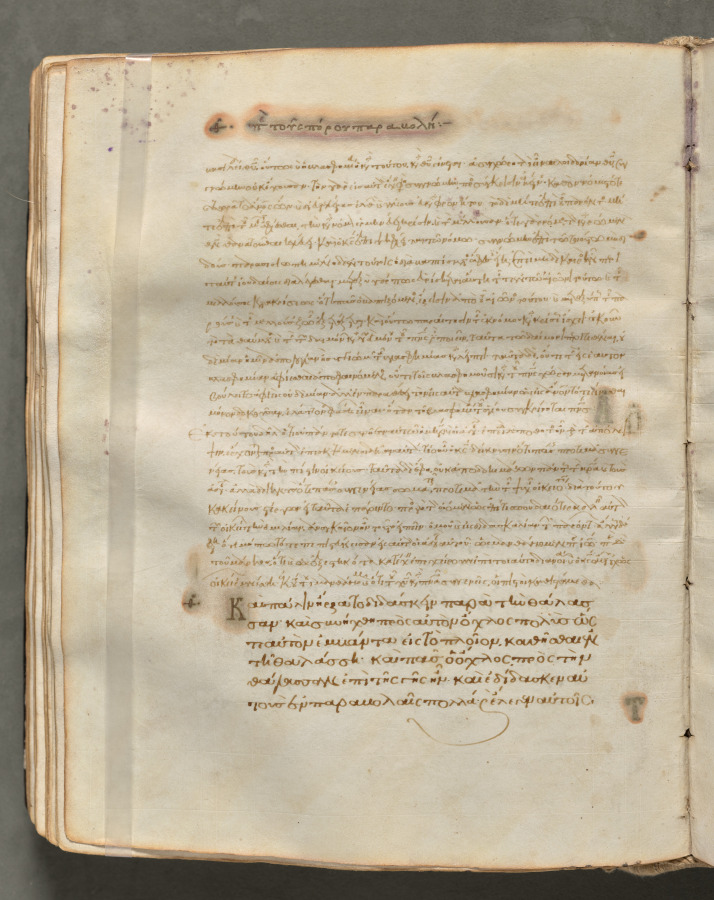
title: Text, folio 142 (verso), from a Gospel Book with Commentaries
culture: Byzantium, Constantinople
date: c. 1000–1100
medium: ink, tempera, and gold on vellum; leather binding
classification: Bound Volume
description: Each of the four gospels in this book opens on a page with brilliantly illuminated borders depicting the author of the text as well as birds-principally peacocks, symbols of the immortality of the soul-and fountains, representing the fountain of life and the salvation of the soul. This volume consists of 428 leaves with texts in Greek. Its level of sophistication suggests that it was probably written and decorated in a monastery in Constantinople.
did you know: Gospel Books were carried in procession through Byzantine churches.